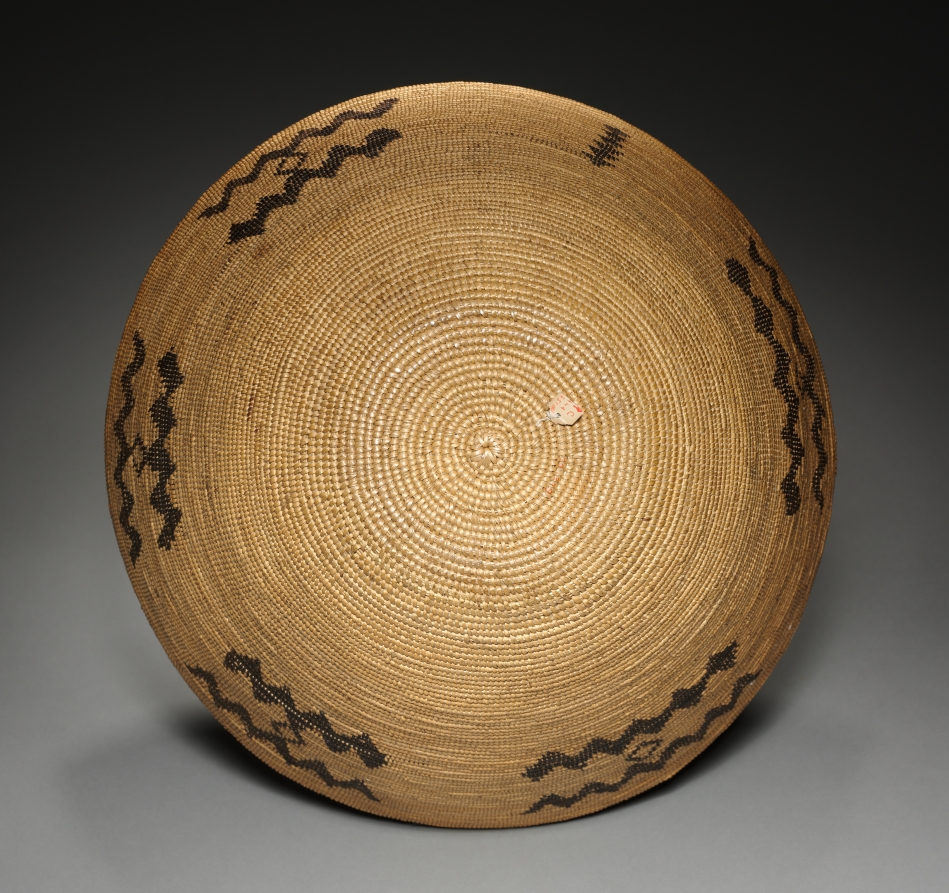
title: Food or Carrying Bowl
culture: California, Pala Band Luiseño, Pala Mission, late 19th - early 20th century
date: late 1800–early 1900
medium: coiled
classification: Basketry